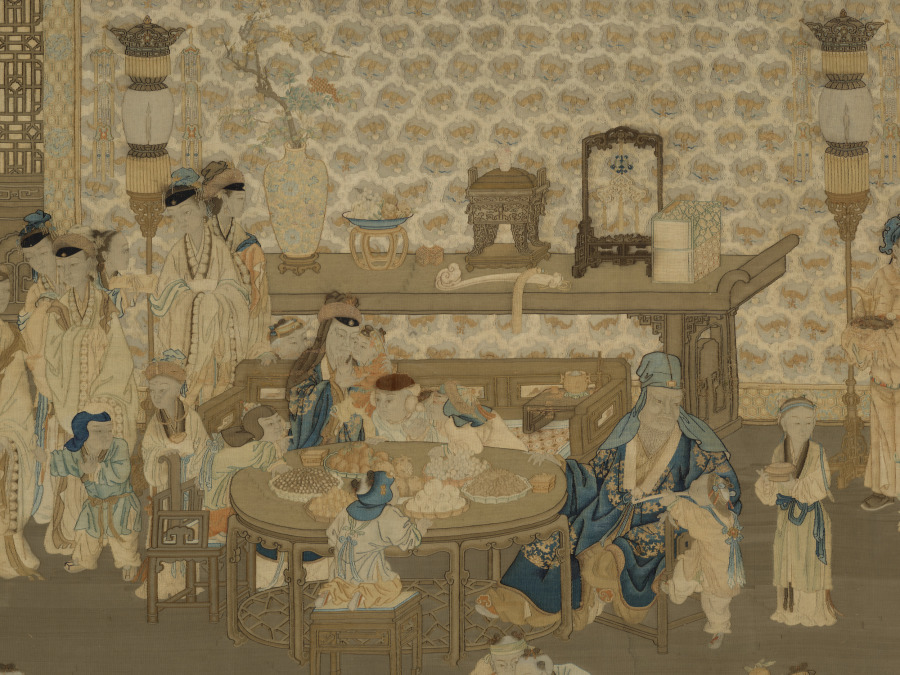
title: Family Gathering on New Year's Morning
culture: China, Qing dynasty (1644-1911)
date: late 1760s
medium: Silk and wool: tapestry weave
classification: Tapestry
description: This European-style tapestry depicts a family gathering, in a woven Western picture frame, that presumably once furnished the Hall of Cultivating the Mind (Yangxin dian) in the Forbidden City. The tapestry employs Western perspective and shading combined with the traditional Chinese subject of a family gathering in a palace, including motifs expressing wishes for good fortune and for a peaceful reign. In 1766, six French tapestries had been presented to the Chinese court. The Qianlong emperor was so intrigued that he commissioned tapestries in the French style from Suzhou. Records mention an imperial order for tapestries in the Western style, such as this one, in 1769, 1770, and 1775.